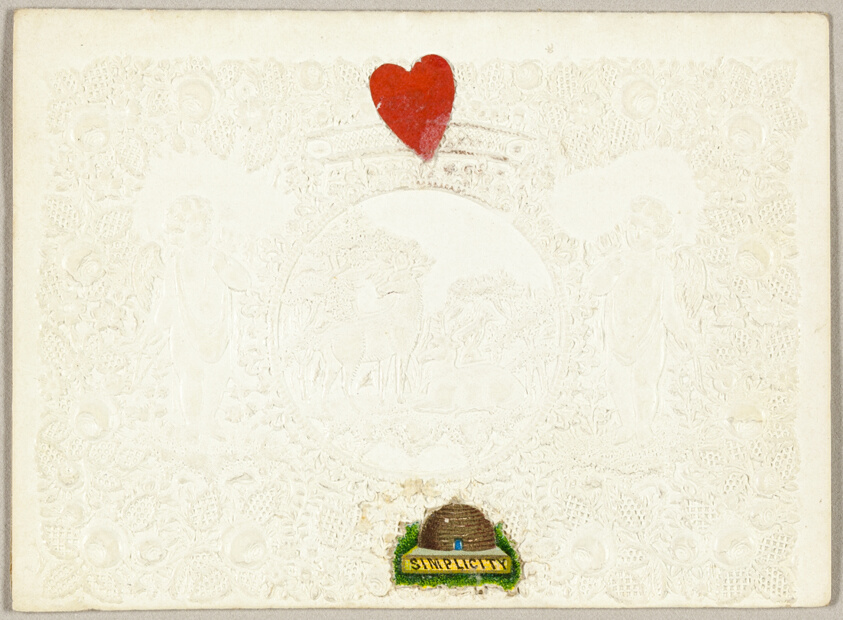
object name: Drawing and Watercolor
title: Simplicity (valentine)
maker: Unknown Artist; American or English, 19th century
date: 1850/59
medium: Collaged elements on embossed ivory wove paper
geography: United States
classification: collage; valentine; prints and drawing; paper